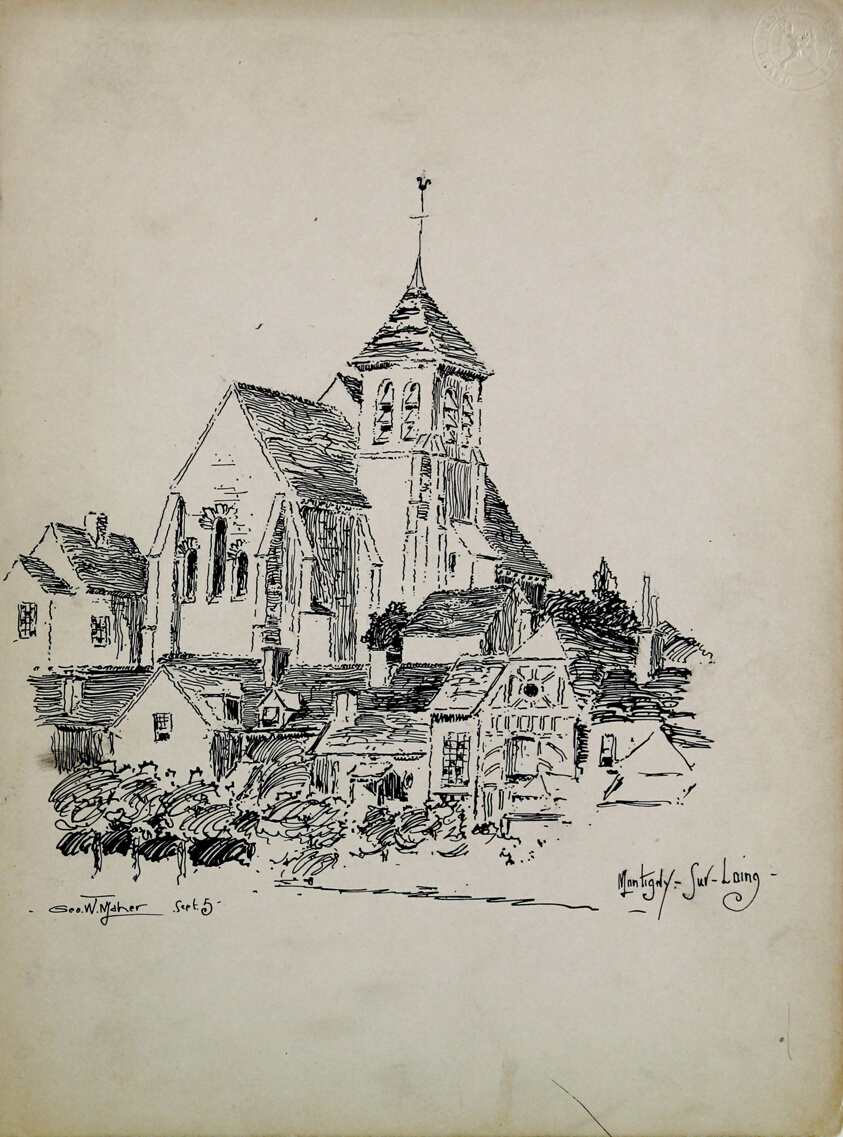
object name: Architectural Drawing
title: Church at Montigny-Sur-Loing, France, Travel Sketch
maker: George Washington Maher (American, 1864–1926)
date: 1891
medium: Ink on heavy paper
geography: United States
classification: drawings (visual works); architecture; architectural drawing